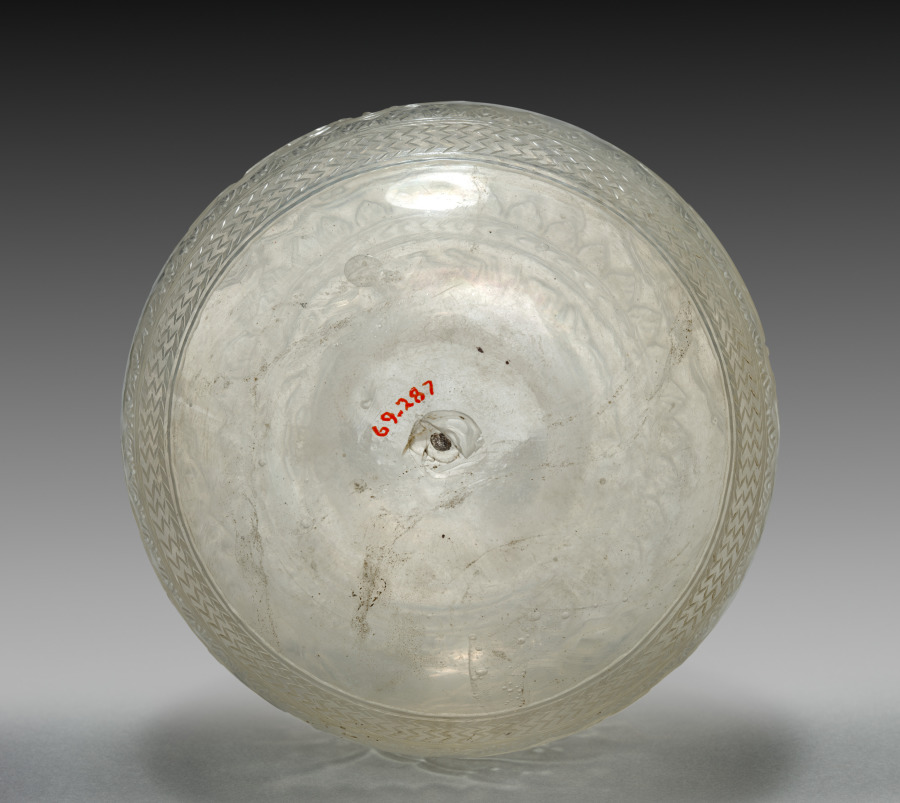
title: Hookah Bowl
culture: India, Mughal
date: 1700s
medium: glass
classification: Glass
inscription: Inscription in Farsi, on body: Even if live charcoal is placed on its head/ The hookah, a teacher of etiquette,/ will not respond unless drawn upon;/ Thus one can learn from its manners of refinement.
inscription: Inscription in Farsi, on shoulder: In the name of Allah the clement and merciful is the key to the wise treasure.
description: The inscription around the body of the base speaks to the use of the hookah in the decadent life of the Mughal court. The hookah is commended for being a proper, refined servant who will not “respond unless drawn upon” or, produce water bubbles when smoke is drawn through the hose. Undoubtedly the witty, poetic allusions would have been appreciated at banquets and other courtly gatherings. The use of wheel-cut glass for this hookah base may have been influenced by English glass and lead crystal that was exported to India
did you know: Around the top of this hookah bowl are incised the opening two lines from the Khamsa (Quintet) of the celebrated Persian poet Nizami (1141–1209).